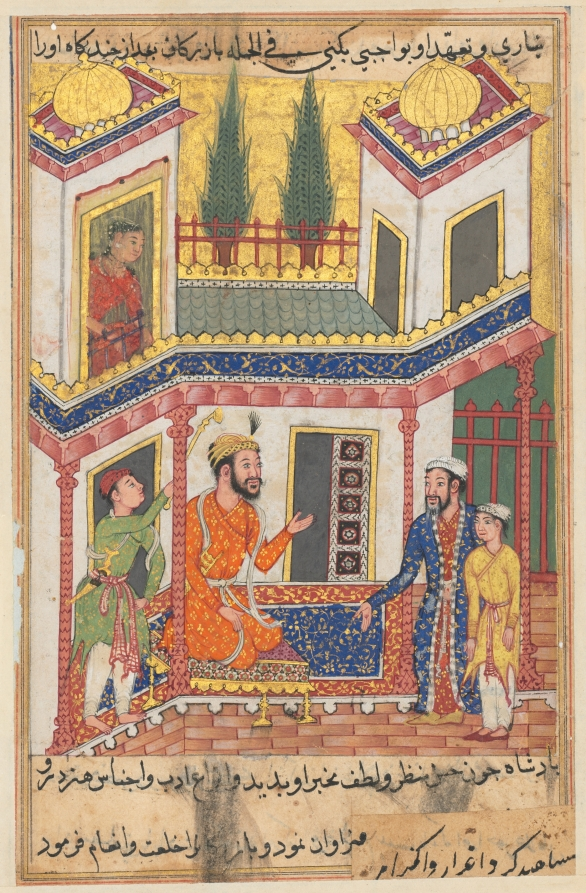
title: The merchant returns bringing a young slave who is really the son of the princess of Rum, now married to the king, from a Tuti-nama (Tales of a Parrot): Fiftieth Night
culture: Mughal India, court of Akbar (reigned 1556–1605)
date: c. 1560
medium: gum tempera, ink, and gold on paper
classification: Painting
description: The princess of Rum watches anxiously from an upper window as her son is introduced to the enthroned king. In order to hide his identity, she has told her husband that the young man has expert knowledge of precious gemstones. The king, impressed with the slave’s skill, welcomes him into his court.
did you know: The artist neglected to paint the white hairs of the fly whisk above the head of the king.